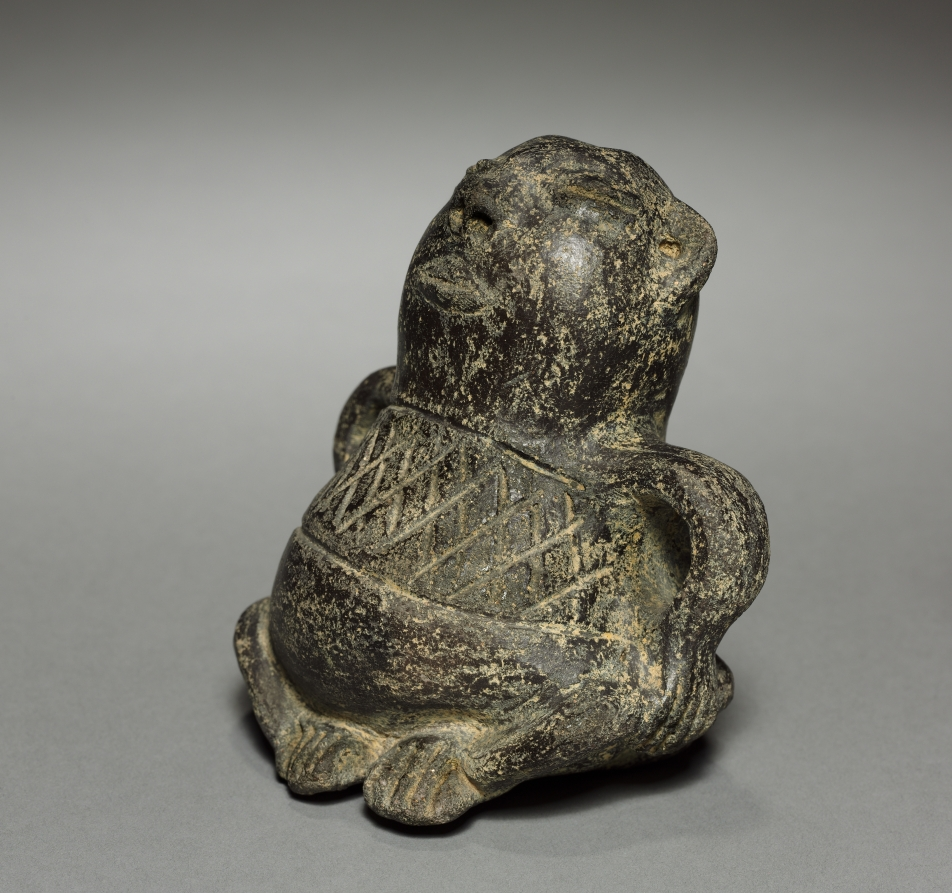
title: Seated Figure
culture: Colombia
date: before 1921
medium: pottery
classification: Ceramic